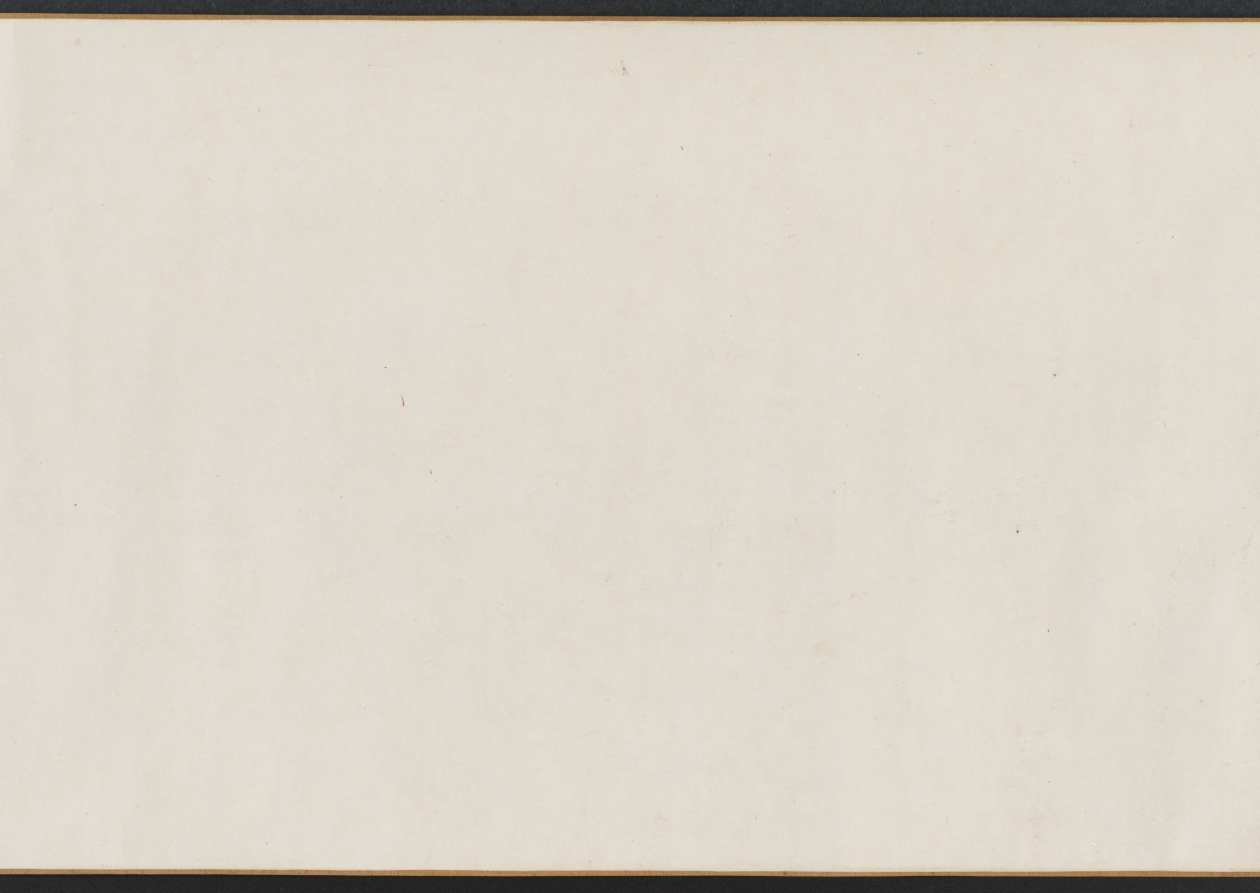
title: The Nine Elders of the Mountain of Fragrance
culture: China, Ming dynasty (1368–1644)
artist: attributed to Xie Huan (Chinese, c. 1370-c.1450)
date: 1426–52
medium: handscroll, ink and color on silk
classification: Painting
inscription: 4 seals: 2 of Xiang Yuanbian 項元汴 (1525–1590); 1 of the Qianlong Emperor (r. 1736-95); 1 of C. C. Wang 王季遷 (1907–2003)